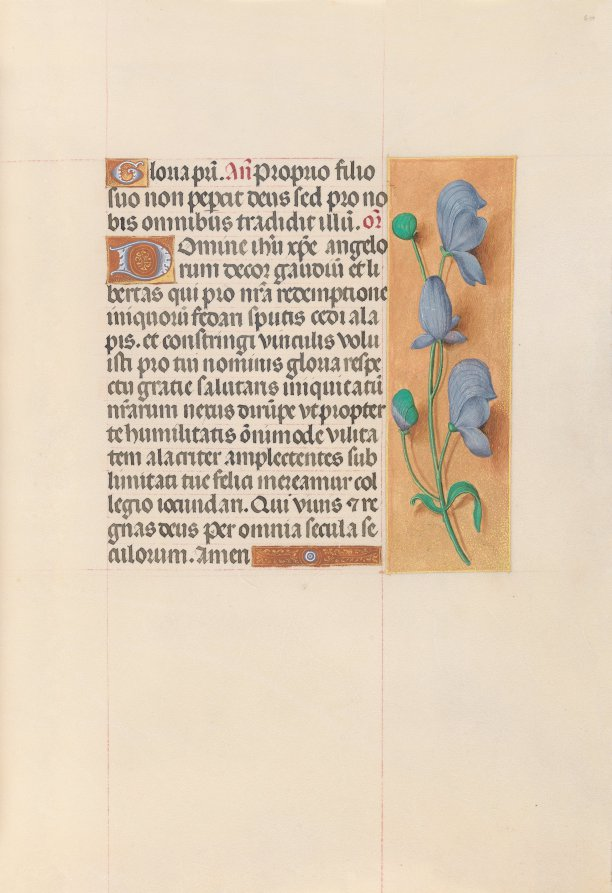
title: Hours of Queen Isabella the Catholic, Queen of Spain: Fol. 60r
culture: Flanders, Ghent and Bruges, late 15th century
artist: Master of the First Prayerbook of Maximillian (Flemish, c. 1444–1519)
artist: and Associates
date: c. 1500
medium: ink, tempera, and gold on vellum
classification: Bound Volume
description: This manuscript was illuminated by a circle of at least five highly organized manuscript painters active in the Flemish cities of Ghent and Bruges. The principal illuminator was Alexander Bening, who painted the majority of the book's miniatures. Manuscripts produced by this circle of artists are renowned for the decoration of their borders, which typically feature a rich variety of realistically-painted flowers, birds, and butterflies. This prayer book, called a book of hours, was intended not for a cleric, but for the private devotions of a lay person-in this case, Isabella the Catholic, Queen of Spain (1451-1504). Isabella's coat of arms embellishes the book's frontispiece. It is unlikely that the book was commissioned by the Queen herself; rather, she probably received it as a diplomatic gift from someone courting her patronage, perhaps Cardinal Francisco Jimenez de Cisneros. A Franciscan friar, Jimenez was dependent upon Isabella for his advancement, first to the post of Queen's confessor in 1492, and then to Archbishop of Toledo in 1495.